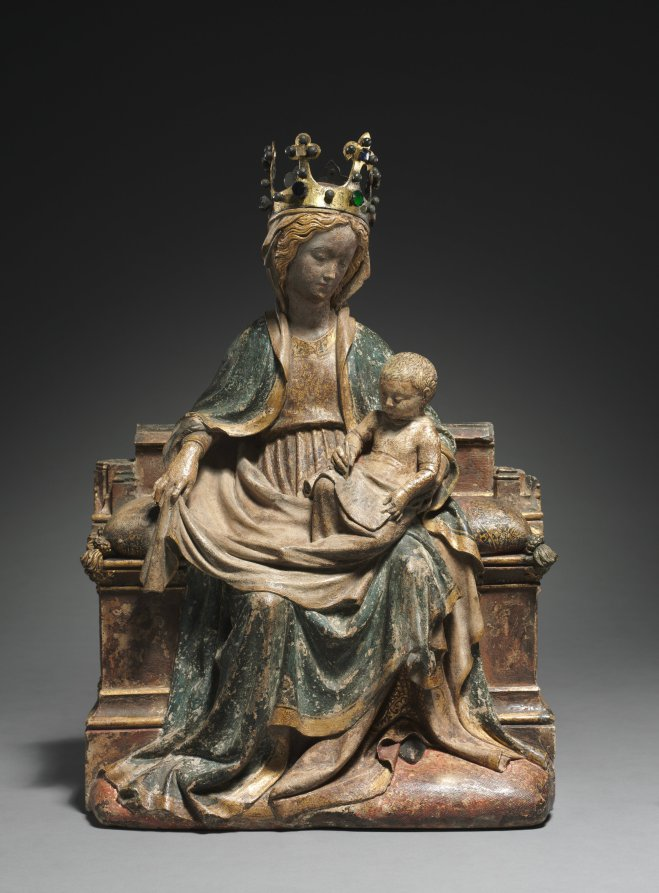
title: Enthroned Virgin with the Writing Christ Child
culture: Franco-Netherlandish, active Paris(?), 15th century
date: c. 1400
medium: limestone with polychromy and gilding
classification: Sculpture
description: This sculpture belongs to a tradition of seated Virgins that were prominent in Netherlandish art in the decades around 1400, and by extension may be associated with the Valois courts at Paris, Dijon, and Bourges. The theme of the Christ child who writes into an open book or onto a vellum banderole emerged during the third quarter of the 14th century and had great appeal among ecclesiastical and aristocratic clients. It undoubtedly refers to the educating and nurturing role of the mother in teaching the child, but also to the future position of the adult Christ as author and teacher. The small scale of this sculpture and the fact that its back is uncarved suggest that it was made for a small alcove or niche, appropriate in the intimate setting of a small chapel or oratory. The sculpture would have primarily been viewed from the front and perhaps from slightly below.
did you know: Here the Virgin is sitting on a highly decorated pillow.